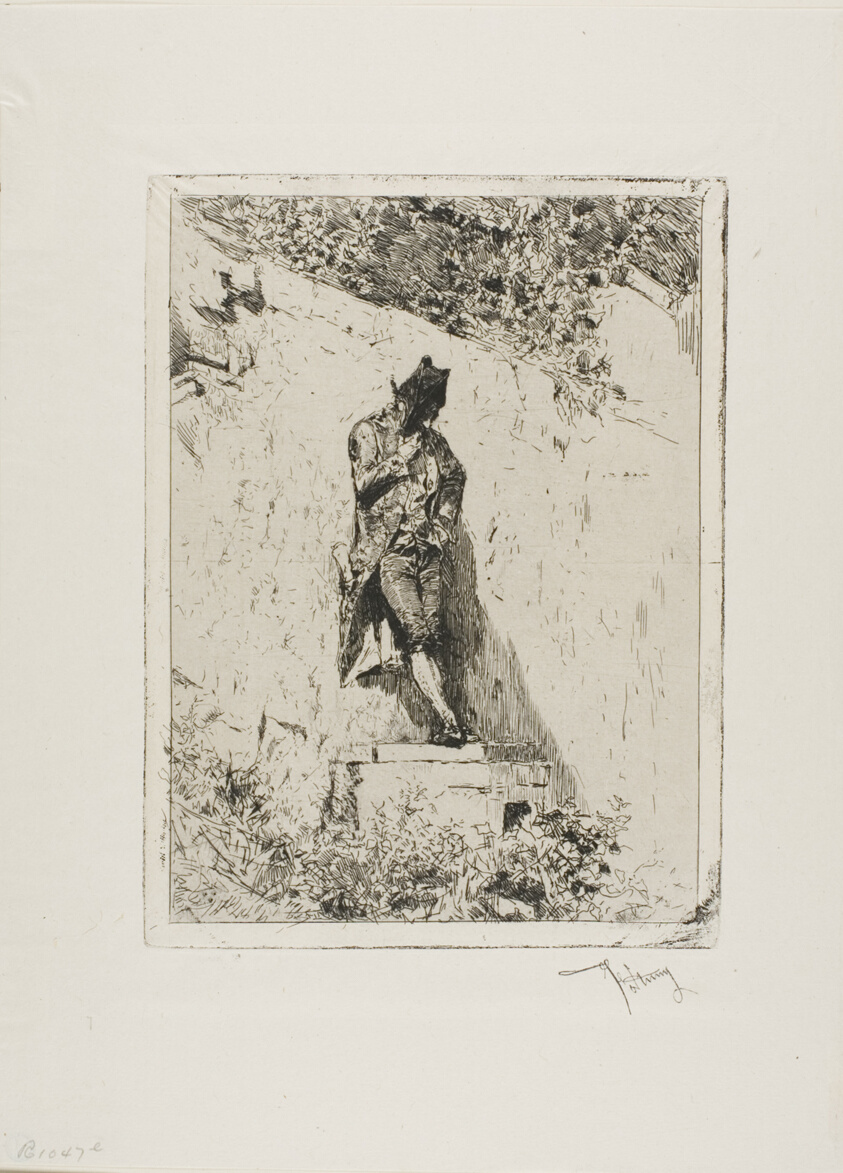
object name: Print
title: Meditation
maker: Mariano José María Bernardo Fortuny y Carbó; Spanish, 1838-1874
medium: Etching on paper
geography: Spain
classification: etching; print; prints and drawing